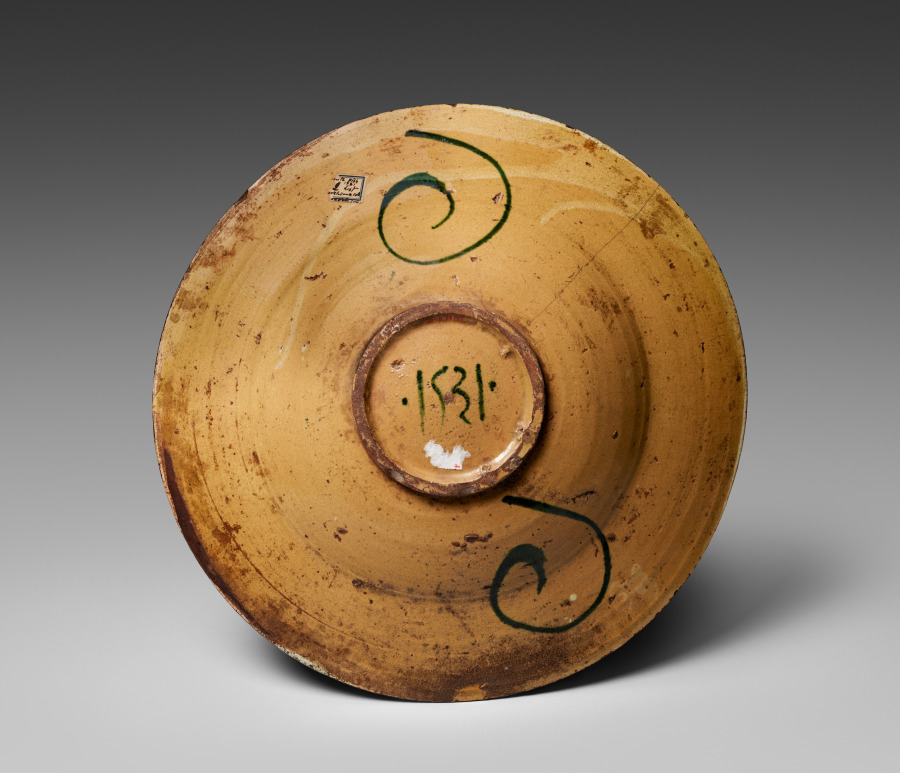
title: Bowl Depicting Saint Francis Receiving Stigmata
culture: Italy, Deruta, 16th century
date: 1531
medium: tin-glazed earthenware (maiolica)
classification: Ceramic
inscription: dated on reverse: "1531"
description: In this depiction representing his closeness to Christ, Saint Francis receives the stigmata through strikes of light from a vision of the risen Lord hovering as an angel in front of the basilica at Assisi. This bowl likely recalls a panel painting produced by the Italian master painter Giotto around 1300.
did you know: According to Christian tradition, the stigmata correspond to the appearance of Christ’s wounds at similar places on the faithful following his crucifixion.